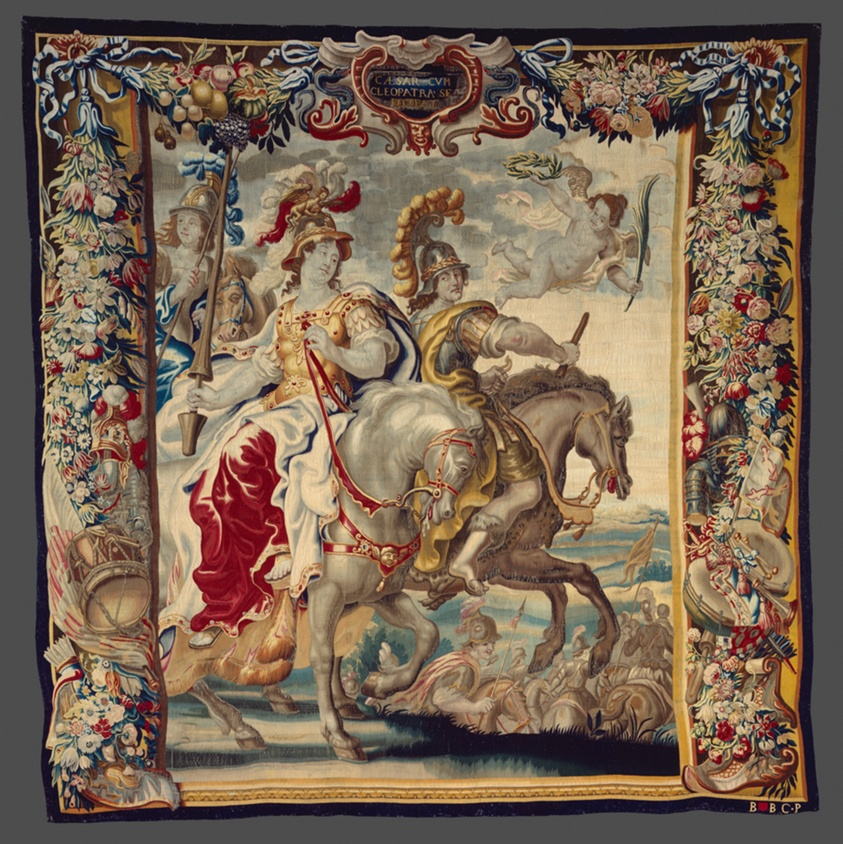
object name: Textile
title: Caesar and Cleopatra Enjoying Themselves from The Story of Caesar and Cleopatra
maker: After a design by Justus van Egmont (1601–1674); Woven at the workshop of Gerard Peemans (1637/39–1725); Flanders, Brussels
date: c. 1680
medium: Wool and silk, slit and double interlocking tapestry weave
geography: Flanders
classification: weaving - tapestry; textile